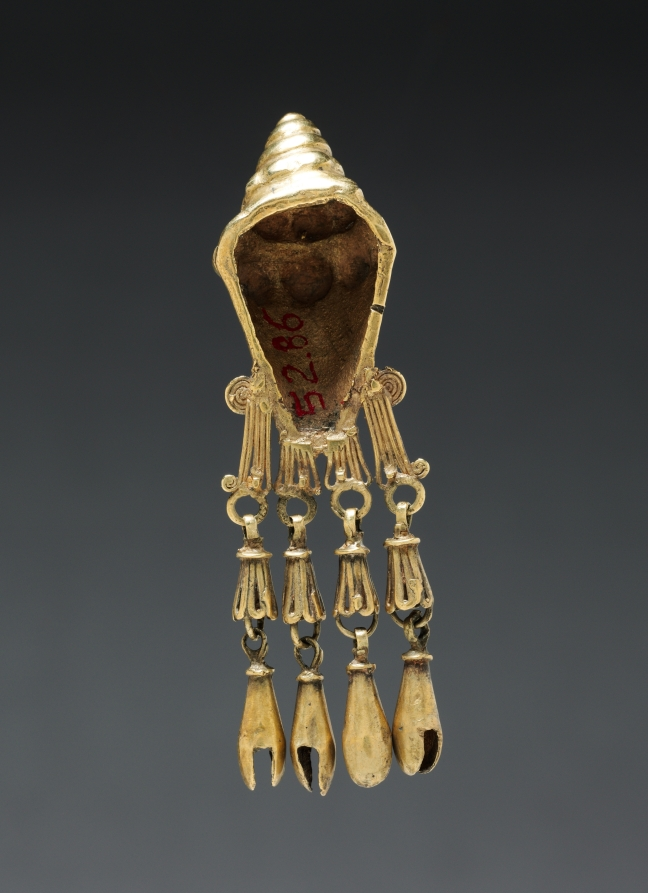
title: Shell Pendant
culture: Mexico, Oaxaca, Mixtec style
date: c. 1200–1519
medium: gold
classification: Jewelry